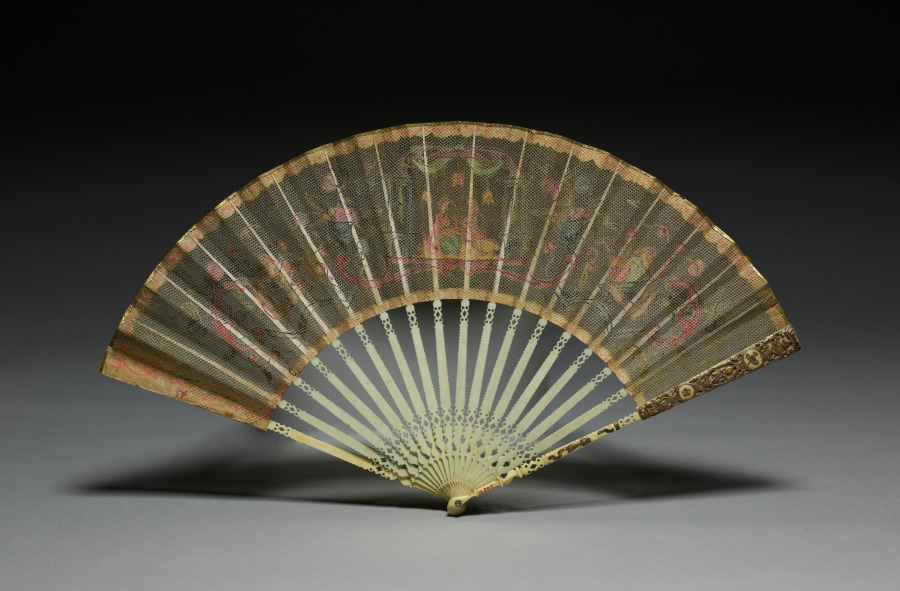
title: Folding Fan: Figures and Ornaments in Applique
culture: Germany (?)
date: c. 1770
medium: leaf: net, paper; frame: ivory with gold and silver inlays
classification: Miscellaneous